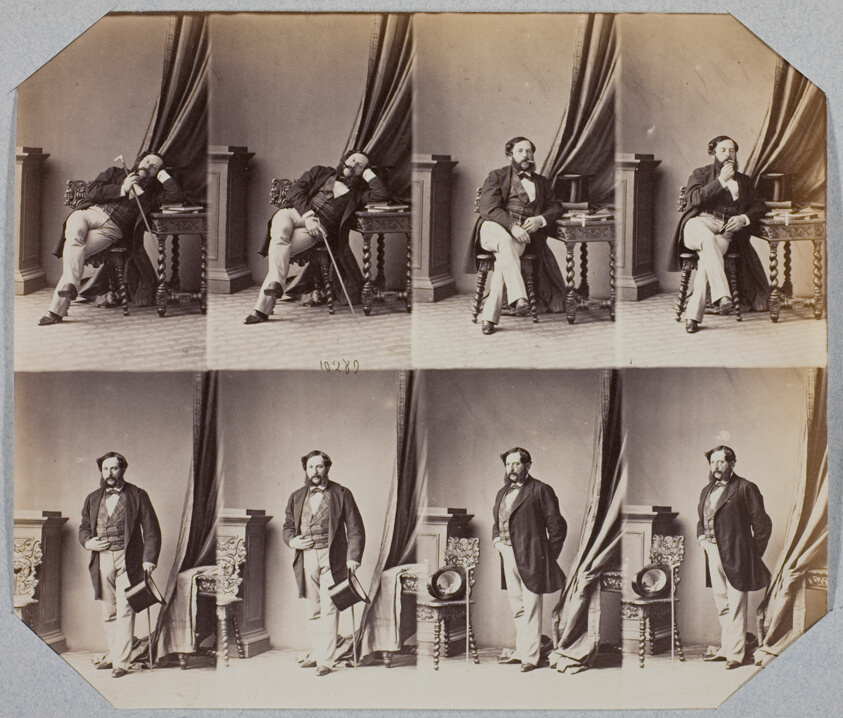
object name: Photograph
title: Napoléon Coste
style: 19th century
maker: André-Adolphe-Eugène Disdéri (French, 1819–1889)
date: 1859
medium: Albumen print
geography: France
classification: photograph; albumen silver print; photography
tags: portraits, portraits: European subject